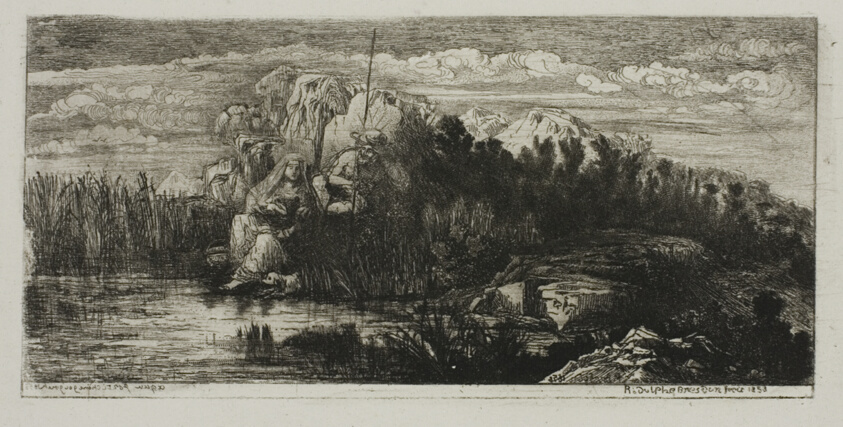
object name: Print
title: The Holy Family with Pole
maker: Rodolphe Bresdin (French, 1825-1885)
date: 1858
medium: Etching on white wove paper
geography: France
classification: etching; print; prints and drawing